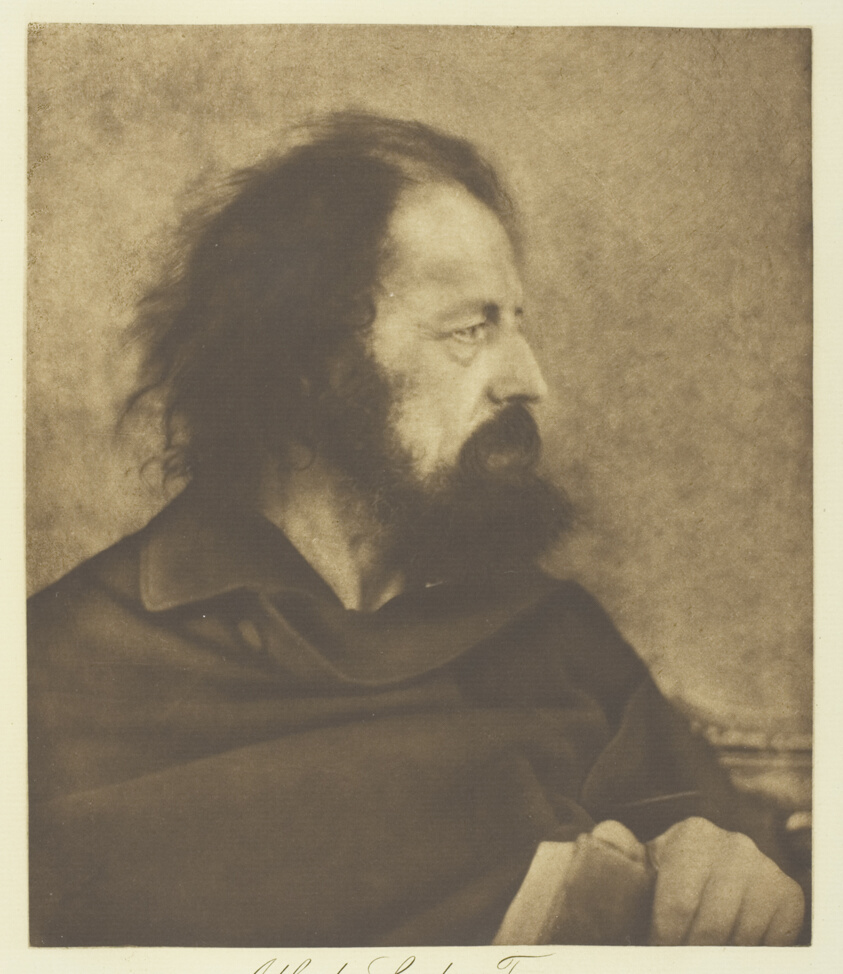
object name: Photograph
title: Alfred, Lord Tennyson (Dirty Monk)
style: 19th century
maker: Julia Margaret Cameron (English, 1815–1879)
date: 1865, printed c. 1893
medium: Photogravure, plate 3 from the album "Lord Tennyson and his Friends" (1893)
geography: England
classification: photogravure; photomechanical process; photography; photograph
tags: Collected by Hugh Edwards, Lord Tennyson and His Friends